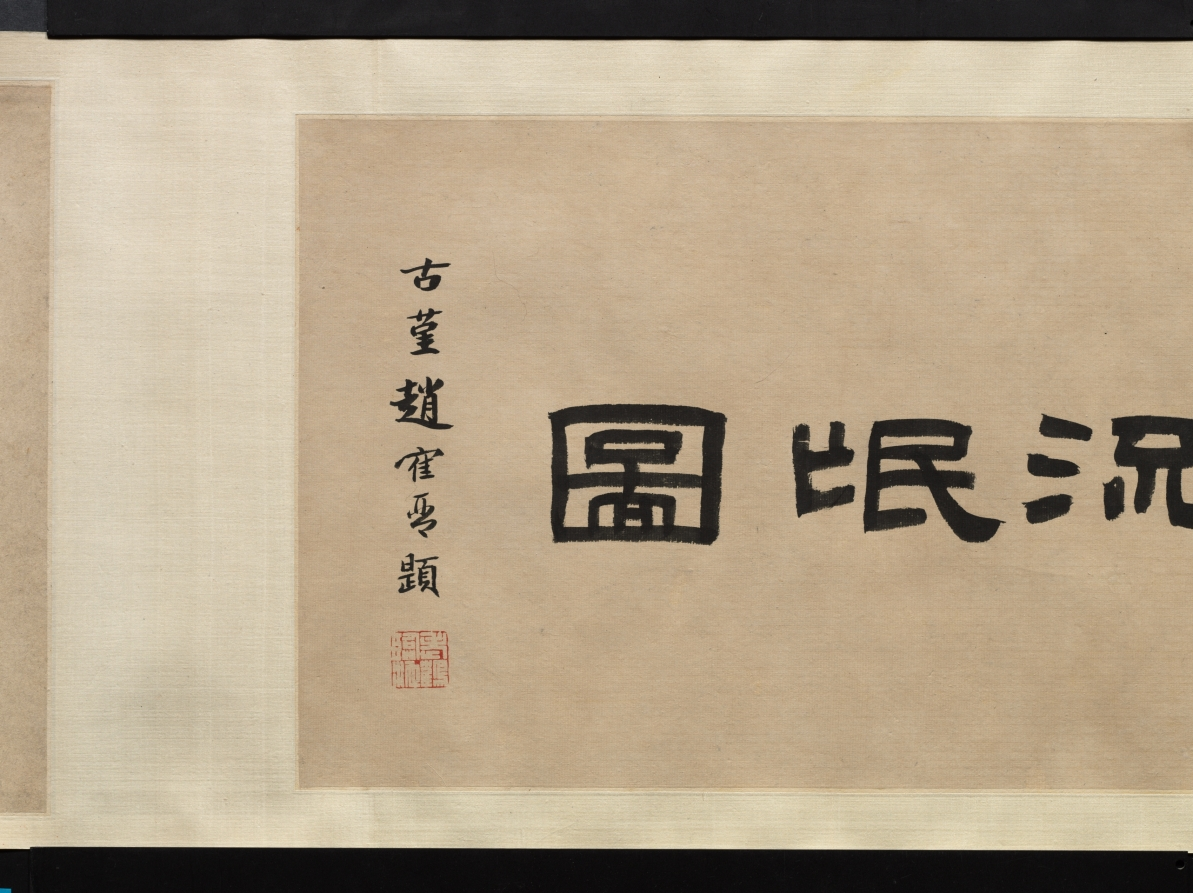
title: Beggars and Street Characters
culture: China, Ming dynasty (1368–1644)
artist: Zhou Chen (Chinese, c. 1450–c. 1536)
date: 1516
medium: Handscroll; ink and light color on paper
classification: Painting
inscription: 題: 周臣流氓圖. 古堇趙鶴琴 [印] 老鶴臨池; 鵝池軒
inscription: 正德丙子秋七月，閒窗無事 ，偶記素見市道丐者種種態度。乘筆硯之便，率爾圖寫。雖無足觀，亦可以助警勵世俗云。 東邨周臣記 [印]東邨; 舜卿; 鵝場散人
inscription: 吳中東邨周君，善丹青，尤長於人物。此圖其所見盛市丐者之狀種種，各盡其態，觀者絕倒。嗟乎，今之晝夜乞哀以求富貴者，安得起周君而貌之耶。臥雲徵君出示，余漫題其後。 甲子歲十月吳門黃姬水 [印] 士雅山人; 另一印不詳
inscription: 是冊凡數種。其飢寒流離疲癃殘疾之狀，種種之異。觀此而不惻然心傷者，非仁人也。計正德丙子逆瑾之流毒已數年。而[江]彬 [錢] 寧輩肆虐方熾。意分符剖竹諸君，亦鮮有能撫字其民者。然則舜卿此作，殆與鄭君 流民圖同意。其有補於治道者不淺，要不可以墨戲忽之也。 長洲張風翼題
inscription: 東村此筆，蓋圖寫飢寒乞丐之態，以警世俗耳。而質山 [黃姬水]欲其寫昏夜乞哀，而靈墟[張鳳翼]則擬之於安上門圖。二君之見，其各有所指哉。昔唐六如每見周筆，輒稱曰：周先生！蓋深服其神妙之不可及。若此冊者，信非他人可能而有符於六如之心伏矣。豈易得耶。若黃、張之指，則又論於畫之外，不在於形似筆墨之旨也。 萬歷丁丑十二月三日 茂苑文嘉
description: Zhou Chen from Suzhou provides rare depictions of impoverished people that once filled the city’s markets and streets. Despite Suzhou’s prosperity, its rapid growth polarized society, including the wealthy and those who had deserted their farmlands, who were without homes, unemployed, or sick. Amid these are figures who inspire fear rather than empathy. The painting may thus be informed by local practices at the end of the lunar year, in which street beggars, in exchange for food or money, would dress up like ghosts and demons to drive out evil forces.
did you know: Although Zhou Chen's original composition was an album of 24 figures, today it is mounted as two handscrolls, one in the Cleveland collection and one in the Honolulu Museum of Art.